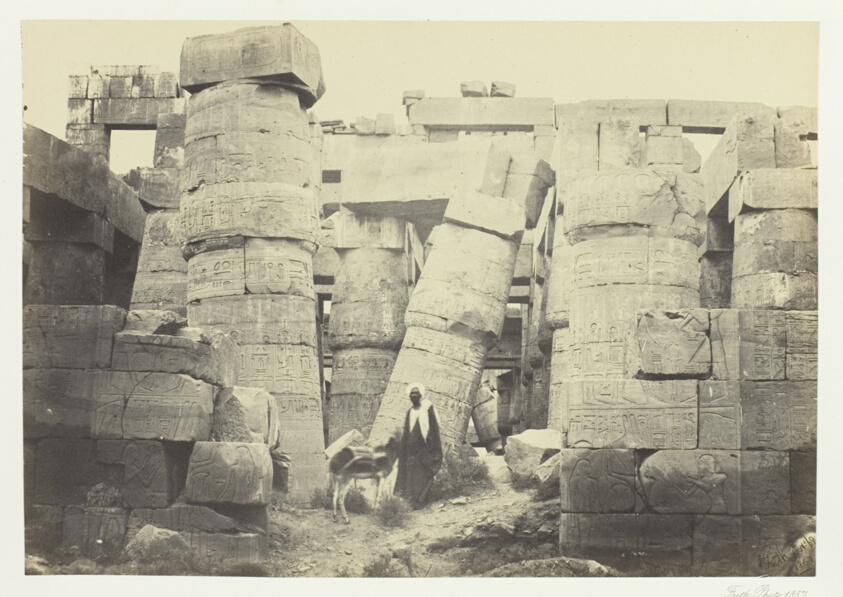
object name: Photograph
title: Pillars in the Great Hall, Karnac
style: 19th century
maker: Francis Frith (English, 1822–1898)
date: 1857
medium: Albumen print, pl. 21 from the album "Egypt and Palestine, Volume II" (1858/60)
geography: England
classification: albumen silver print; photographic process; photography; photograph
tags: Collected by Hugh Edwards, Egypt and Palestine